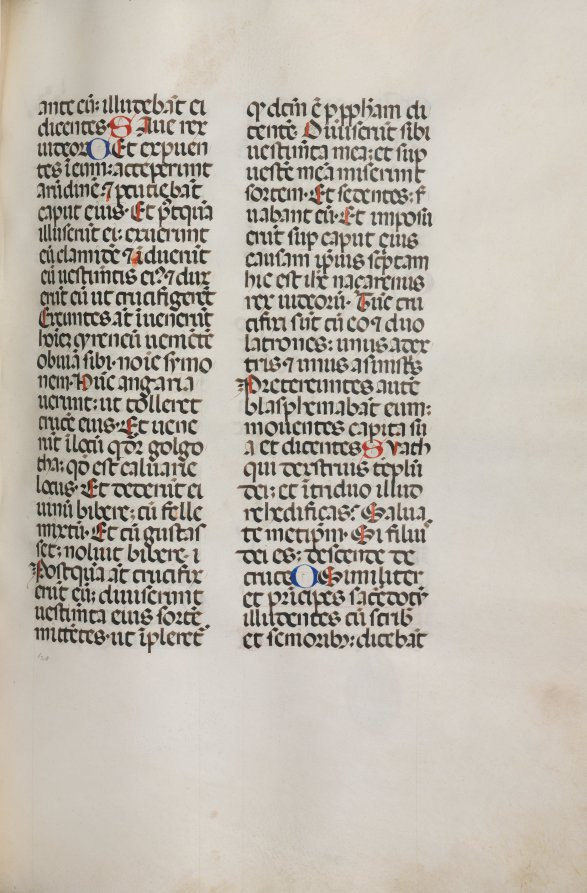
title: Missale: Fol. 121: contains music for "Hely Hely Lama etc." within St. Mattion Passion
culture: Italy, Perugia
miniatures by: Bartolommeo Caporali (Italian, c. 1420–1503)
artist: assisted by Giapeco Caporali (Italian, d. 1478)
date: 1469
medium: ink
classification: Bound Volume